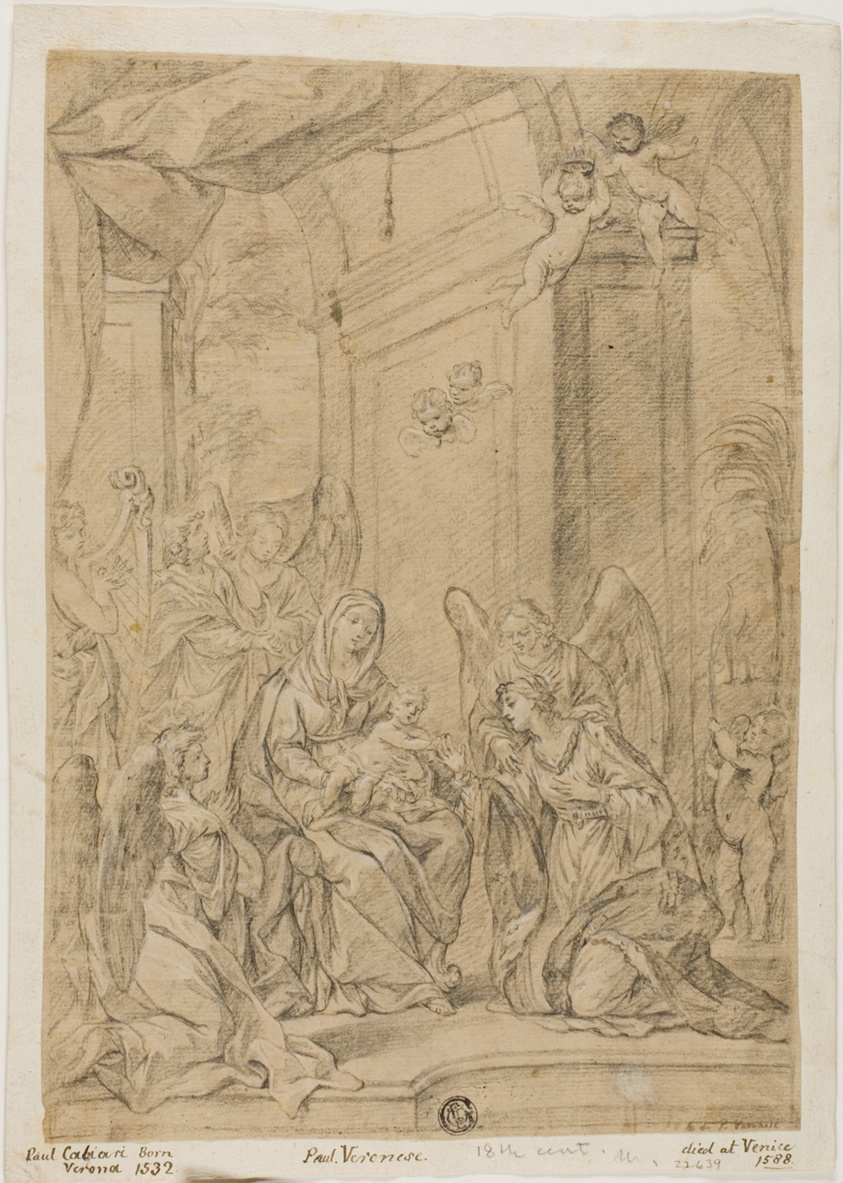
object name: Drawing and Watercolor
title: Mystic Marriage of St. Catherine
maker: After Paolo Caliari, called Paolo Veronese (Italian, 1528-1588); or Agostino Masucci (Italian, c. 1691-1758); or Paolo Farinato (Italian, 1524-c. 1606); or style of Carlo Maratti (Italian, 1625-1713)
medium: Black chalk, heightened with touches of white chalk, on tan laid paper, laid down on ivory laid paper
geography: Italy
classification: chalk; paper; drawings (visual works); prints and drawing